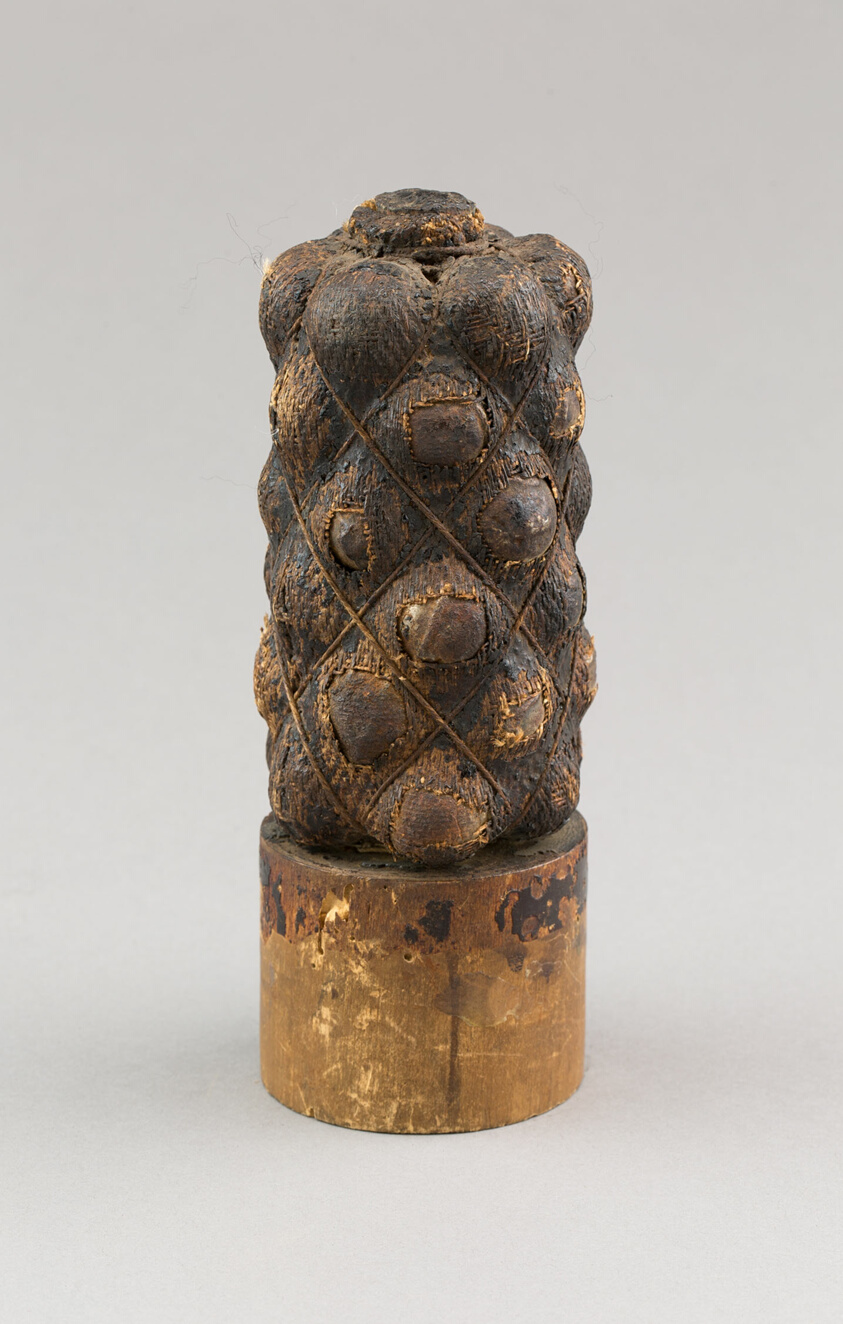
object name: Arms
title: Grape Shot (Projectile) for a Cannon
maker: Austrian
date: 17th Century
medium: Wood, canvas, and iron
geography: Austria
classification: firearm-accessory; arms; arms and armor